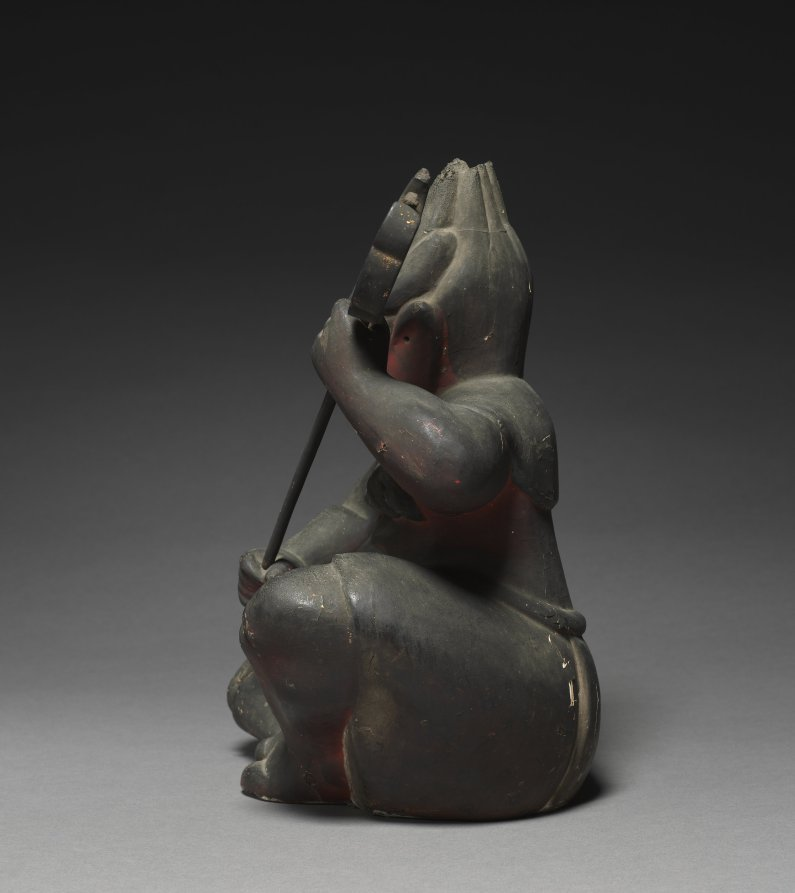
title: Seated Zenki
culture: Japan, Muromachi period (1392–1573)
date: 1400s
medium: wood with pigment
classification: Sculpture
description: The axe-wielding red Zenki, and the vase-holding, bamboo backpack-wearing green Koki are both under the mystical control of the monk, En no Ozunu (legendarily 634–701), also known as En no Gyōja, or “En the Ascetic,” considered to have founded Shugendō, a style of religious practice focused on performing austerities in mountainous settings.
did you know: A popular Japanese comic named Zenki was inspired by the figure seen here wielding a weapon.